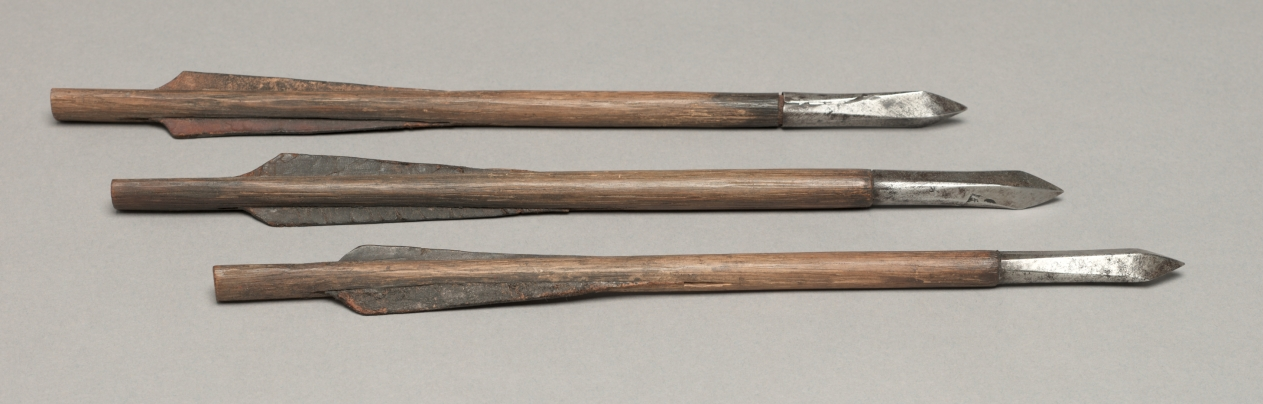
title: Crossbow Bolt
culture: Germany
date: 1500s–1600s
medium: wood, leather, steel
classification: Arms and Armor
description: Also known as a quarrel, crossbow bolts are stockier than arrows, are constructed of durable materials, and can be reused on the field of battle.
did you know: Bolts with leather feathering were used mainly in the Tyrolean area, which includes northern Italy and western Austria.